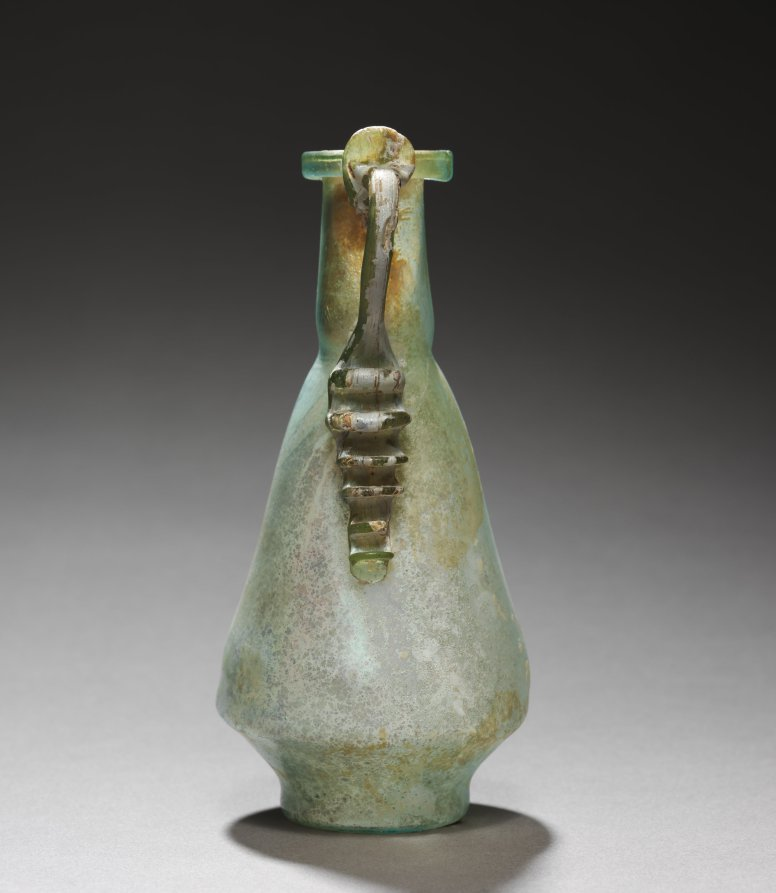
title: Jug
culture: Cyprus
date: 100–300 CE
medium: glass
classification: Glass